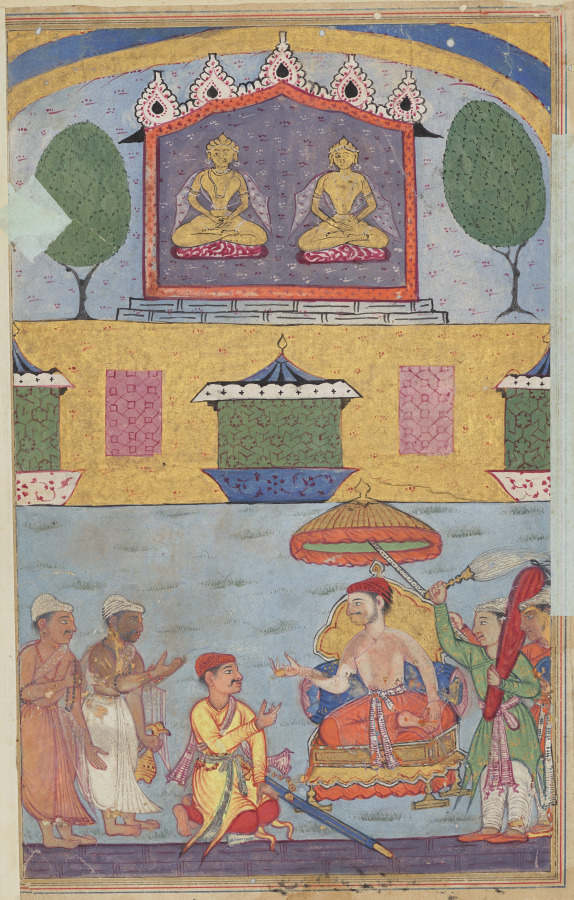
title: The goldsmith and the carpenter inform the king of a dream in which the golden images plan to desert the city for lack of worshippers, from a Tuti-nama (Tales of a Parrot): Third Night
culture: Mughal India, court of Akbar (reigned 1556–1605)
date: c. 1560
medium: gum tempera, ink, and gold on paper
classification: Painting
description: In this story, a goldsmith and a carpenter plan to steal a city’s idols by convincing the king that they have left on their own. They appear before the king, who addresses them from beneath a parasol in the lower register. The two golden idols sit in a shrine in the upper register.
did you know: The dark-skinned figure on the left was originally painted in a peach toned complexion that is still visible on his torso.